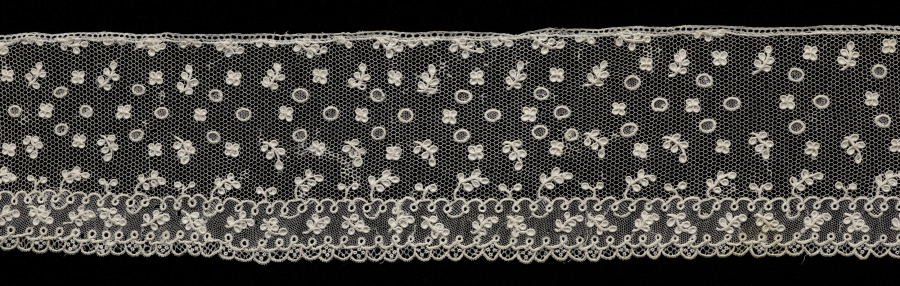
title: Lace Edging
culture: France, Alençon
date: 1760–99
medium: Needle lace (Point d'Alençon)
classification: Lace